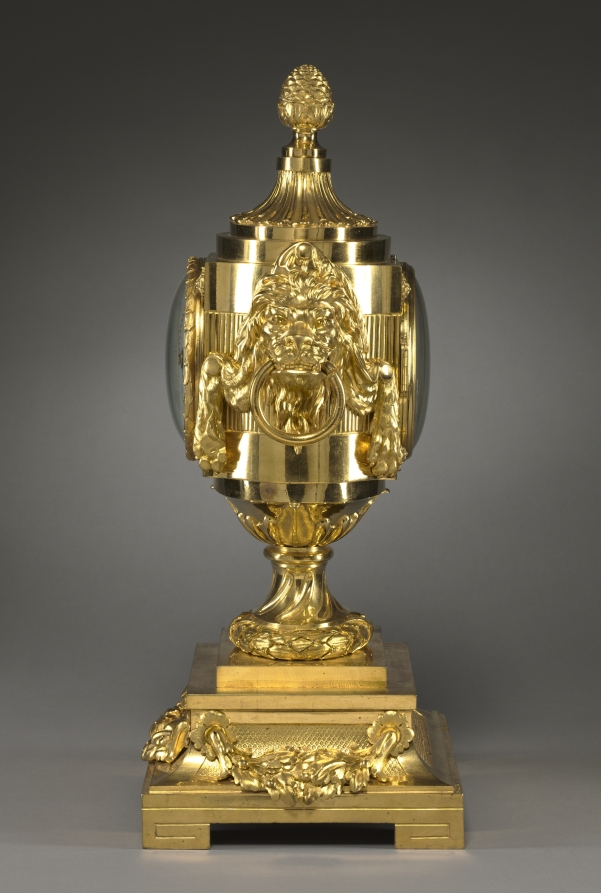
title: Clock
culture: France, 18th century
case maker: Robert Osmond (French, 1711–1789)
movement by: Robert Robin (French, 1742–1799)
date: c. 1785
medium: gilt bronze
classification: Furniture and woodwork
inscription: face of clock inscribed: "Robin ger Du Roi"